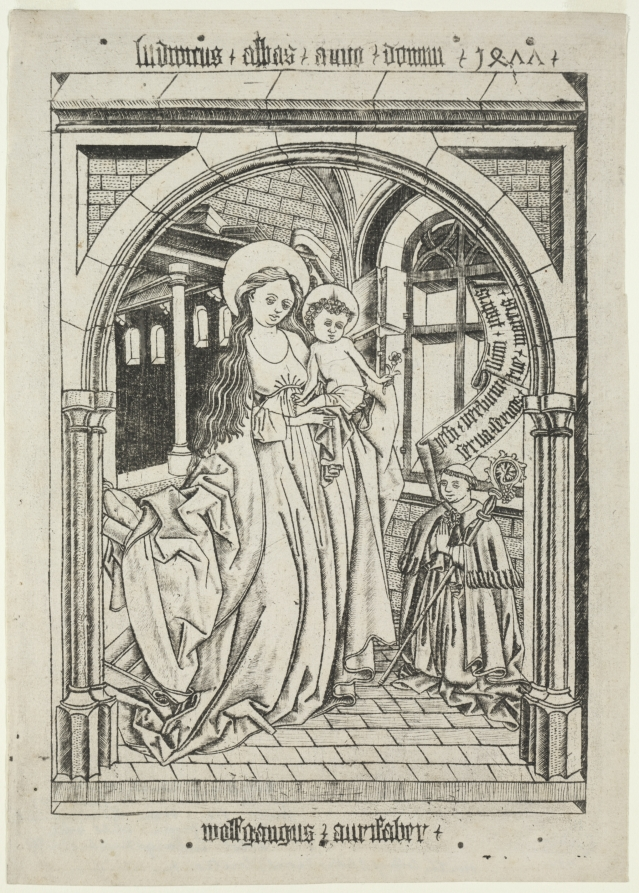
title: Virgin and Child, Abbot Ludwig Kneeling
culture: Germany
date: 1400s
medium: woodcut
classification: Print